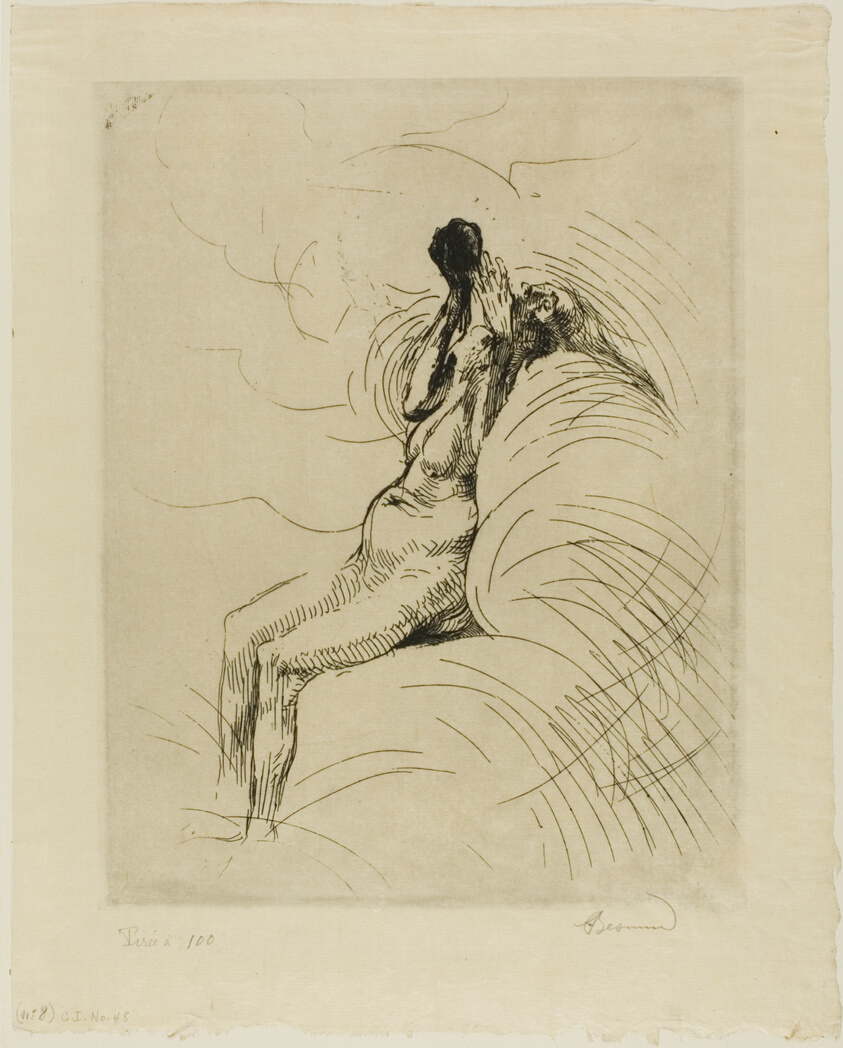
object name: Print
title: Apotheosis, plate twelve from Woman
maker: Albert Besnard (French, 1849-1934)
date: c. 1886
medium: Etching on cream Japanese paper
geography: France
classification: etching; print; prints and drawing